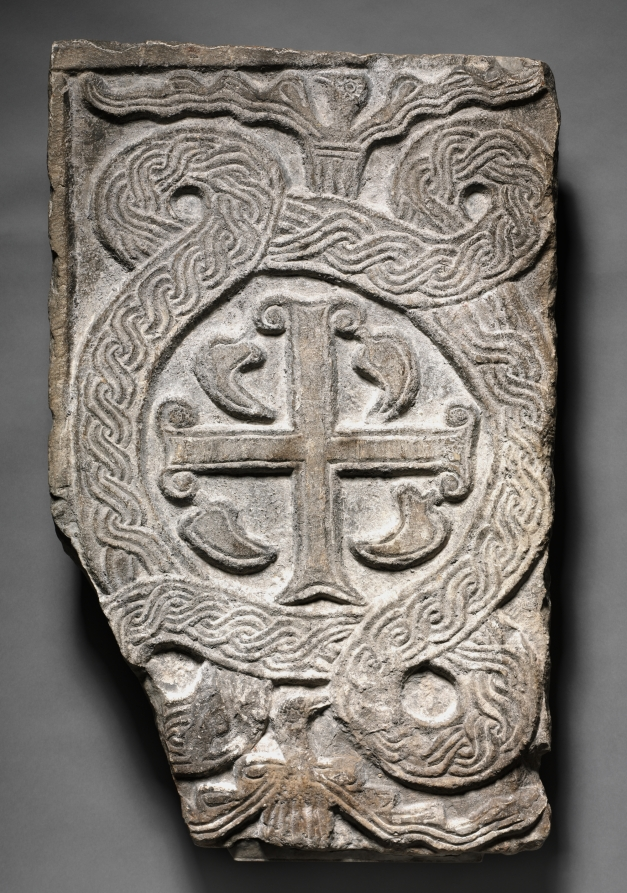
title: Transenna Panel with a Cross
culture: Lombardic, Italy, Rome, Migration period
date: 700s-800s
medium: marble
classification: Sculpture